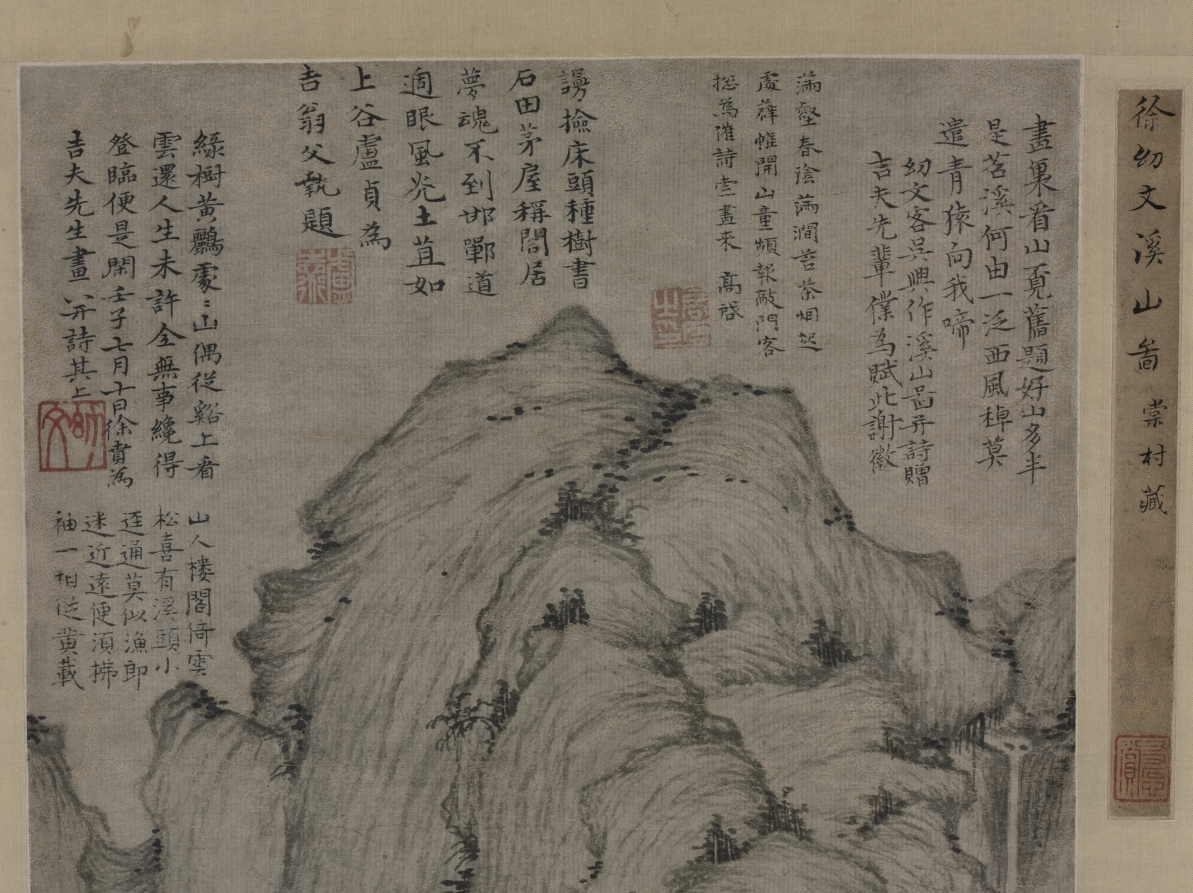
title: Streams and Mountains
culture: China, Yuan dynasty (1271-1368)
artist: Xu Ben (Chinese, 1335–1380)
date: 1372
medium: hanging scroll, ink on paper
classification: Painting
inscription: 綠樹黃鸝處處山， 偶從谿上看雲還。/ 人生未許全無事， 纔得登臨便是閑。 壬子七月十日徐賁為吉夫先生畫 並詩共上 [印] 幼文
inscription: Label on mounting probably by Liang Qingbiao 梁清標 (1620–1691).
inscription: 4 additional inscriptions and 9 additional seals: 1 poem of Xie Hui 謝徽 (c. 2nd half 14th c.); 1 poem and 1 seal of Gao Qi 高啟 (1336–1374); 1 poem and 1 seal of Lu Zhen 盧貞 (c. late 14th c.); 1 poem of Huang Zai 黃載; 3 seals of Liang Qingbiao 梁清標 (1620–1691); 1 seal of Wang Jiqian [C. C. Wang] 王季遷 (1907–2003); 3 seals unidentified.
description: Like many literati of the late Yuan and early Ming dynasties, Xu Ben was entangled with the perils of dynastic change as well as the ups and downs of his official career. It was mainly through the art of painting and poetry, as well as the ideal of reclusion, that he sought feelings of exhilaration and shared them with his friends. Xu created this monumental landscape during one of his periods of reclusion. His innumerable “hemp-fiber” texture strokes create a unifying rhythm among the towering mountains with tightly knit masses of rocks. Nestled among shady trees at the base of the mountain is a rustic retreat, which a scholar approaches on foot to visit with the hermit. Among the five inscriptions at the top of the painting is one by the artist himself. He dedicated the painting to someone named Jifu 吉夫 and recorded a poem in praise of mountains. Green trees, yellow orioles, everywhere are mountains; Aimlessly I return from the stream, where I watched the clouds. Man's life does not allow unbroken ease, But to be able to be high up in the mountain, this is leisure.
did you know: An attendant opens a reed gate to welcome the scholar with a walking stick approaching the rustic retreat.